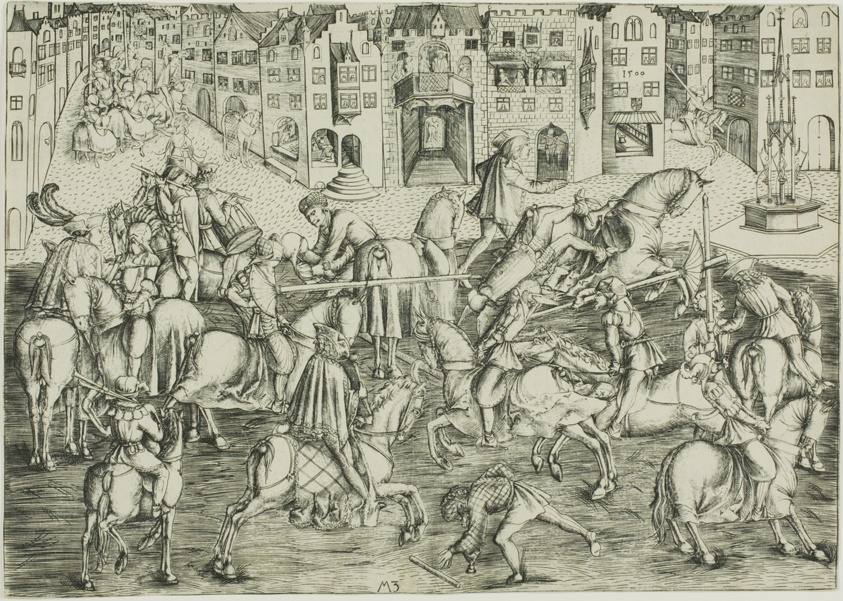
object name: Print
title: The Tournament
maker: Master M.Z.; German, active 1500-1550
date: 1500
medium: Engraving on ivory laid paper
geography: Germany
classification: engraving; print; prints and drawing